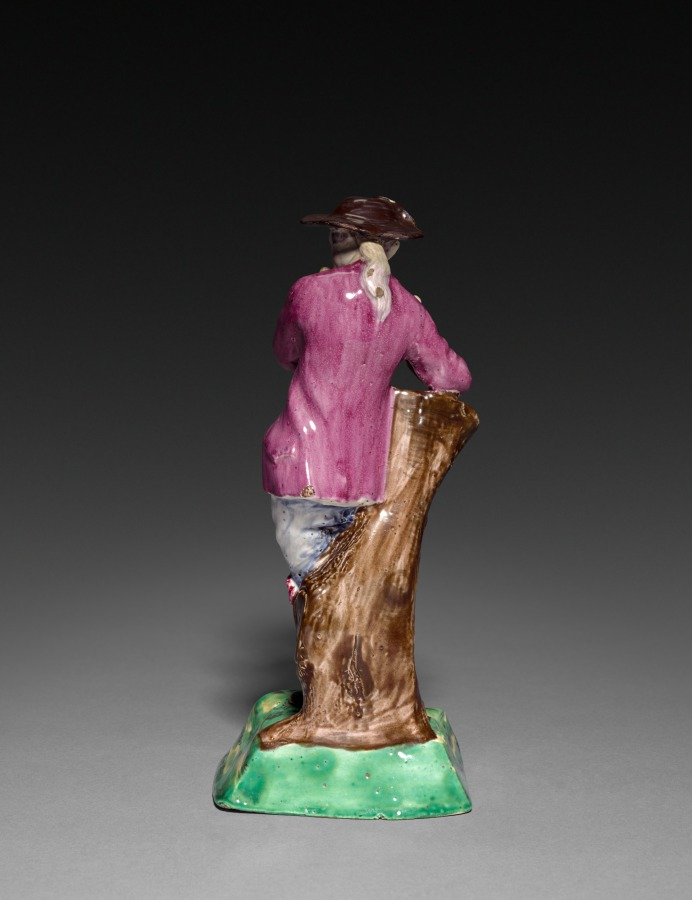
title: Boy Playing a Flute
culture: France, 18th century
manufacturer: Saint-Amand-les-Eaux (French)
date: 1760–1770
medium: faience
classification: Ceramic